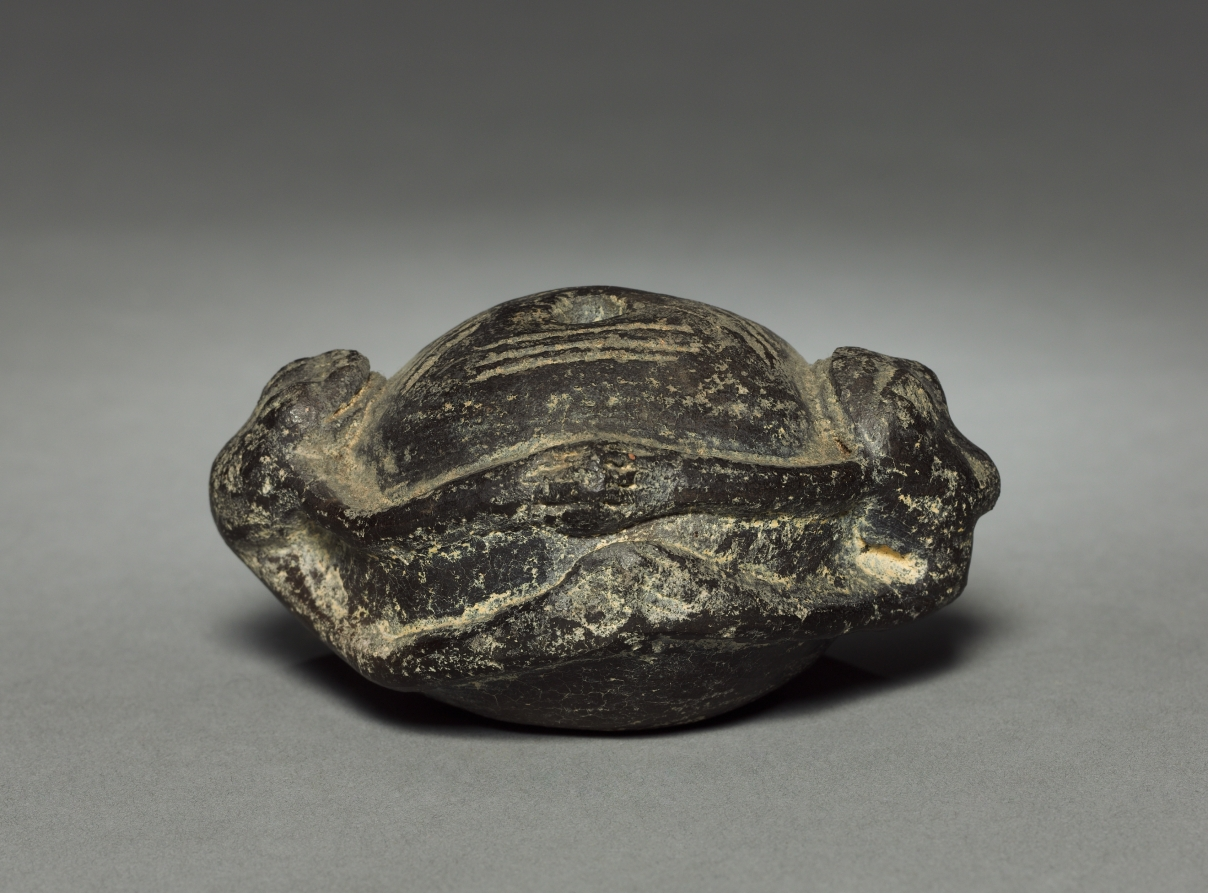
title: Jar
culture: Colombia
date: before 1921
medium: pottery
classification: Ceramic